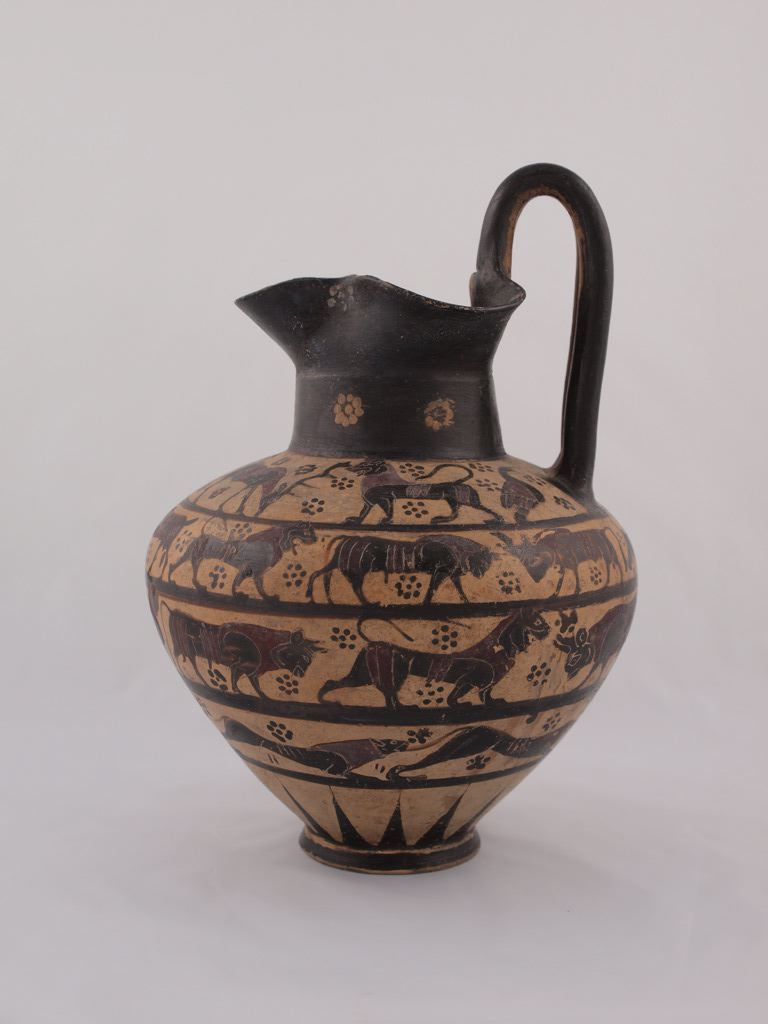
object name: Vessel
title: Oinochoe (Pitcher)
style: corinthian (pottery style), black-figure, ancient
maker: Greek; Corinth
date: 640-625 BCE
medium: terracotta, black-figure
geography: Corinth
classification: pitcher (vessel); earthenware; ceramics; vessel; ancient art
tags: animals, dogs, drinking, bull, lions